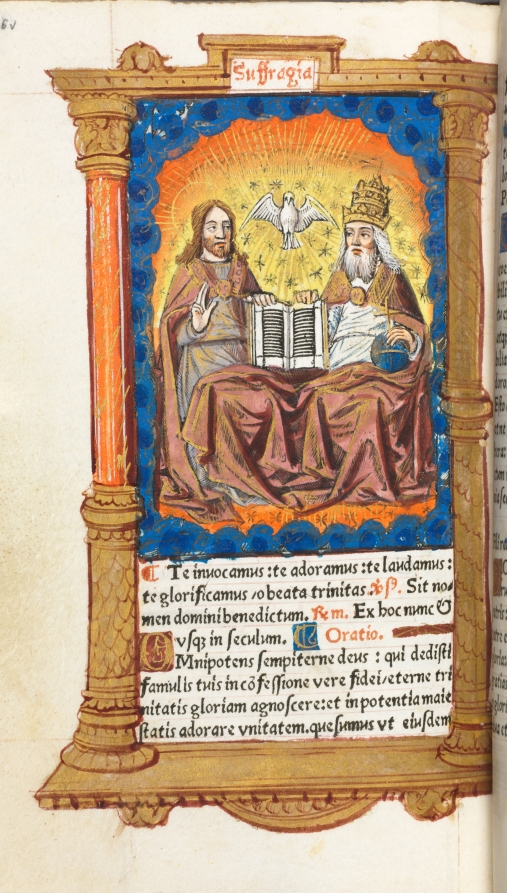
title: Printed Book of Hours (Use of Rome): fol. 94v, The Trinity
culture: France, Paris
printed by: Guillaume Le Rouge (French, Paris, active 1493–1517)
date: 1510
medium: 112 Printed folios on parchment, bound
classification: Bound Volume